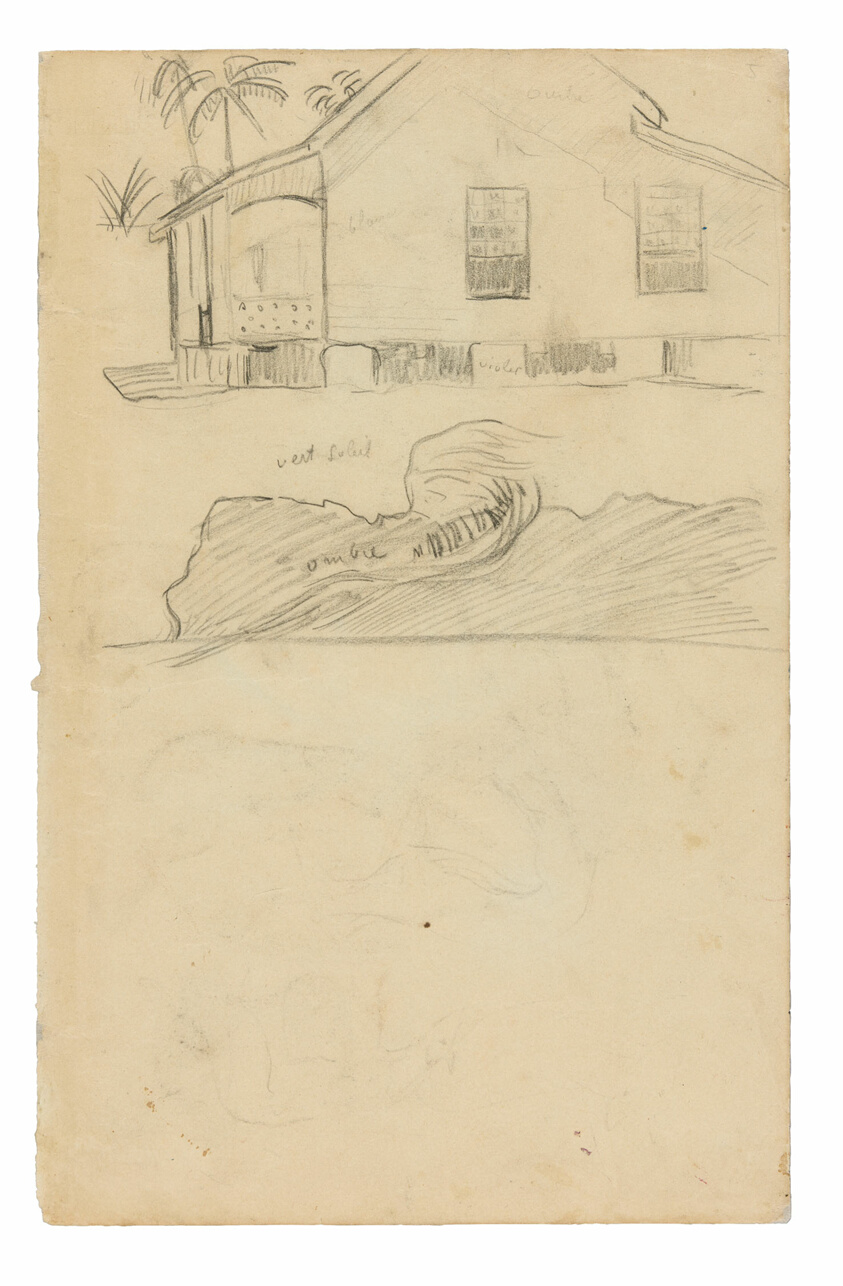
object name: Drawing and Watercolor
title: Sketches of Tahitian Residence with Color Notations and Dogs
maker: Paul Gauguin (French, 1848-1903)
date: 1891/93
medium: Black fabricated chalk, with black fabricated chalk offset, on cream wove paper (removed from a sketchbook)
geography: France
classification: crayon; drawings (visual works); prints and drawing